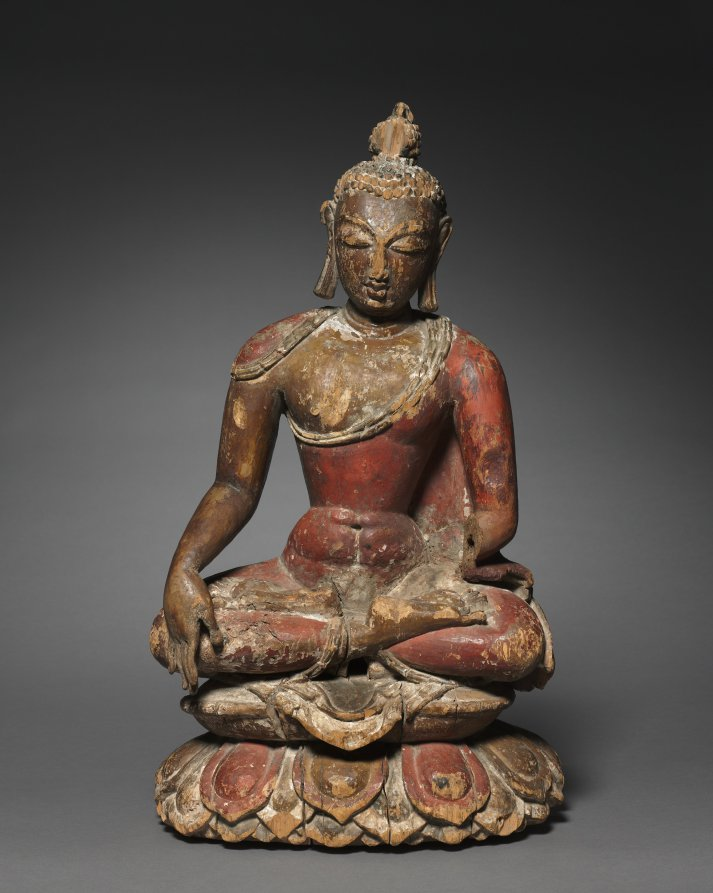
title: Seated Buddha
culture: Western Himalayas, possibly Ladakh or Lahul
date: 1000s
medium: painted wood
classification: Sculpture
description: Eleventh-century western Tibet experienced a period of fervent reconstruction of Buddhist monasteries following the persecution of Buddhism during the 9th and 10th centuries. Art from Kashmir was avidly collected and copied as part of those reconstruction efforts. Kashmiri stylistic traits, such as the pinched waist and abdominal musculature seen in this rare wooden image, are from that critical time. The pioneering Italian Tibetologists Giusseppe Tucci and Egenio Ghersi discovered this sculpture during an expedition to Tibet from 1933 to 1935